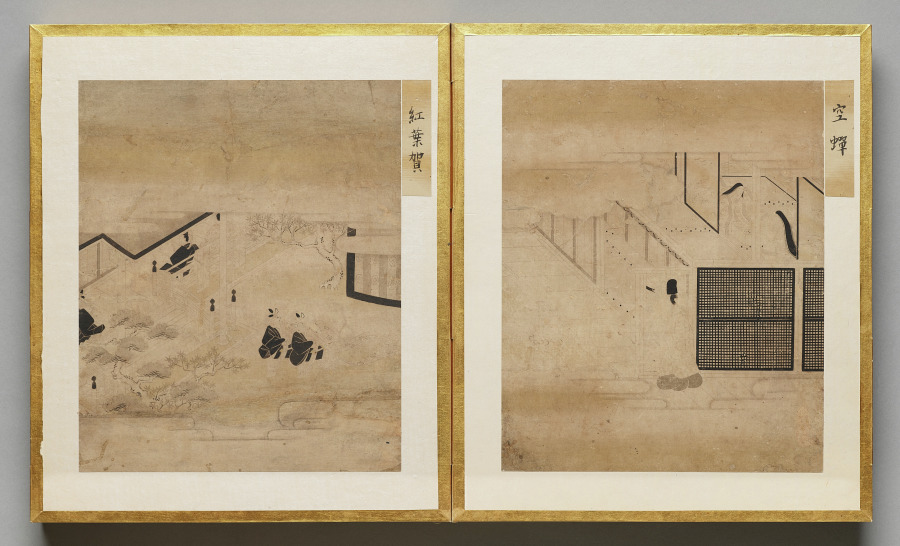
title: Shell of the Locust from Album of Illustrations for the Tale of Genji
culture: Japan, Edo period (1615–1868)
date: 1600s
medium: painting in an accordion-style album; ink, light color, and gold on paper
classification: Bound Volume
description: This album contains illustrations for the classic literary work the Tale of Genji, authored in the 1000s by Murasaki Shikibu, an aristocrat of the Heian period (794–1185) court. The scenes are painted in the “white drawing” (hakubyō) mode, in which a fine ink line is used to depict figures and spaces with great subtlety, punctuated only occasionally by traces of red pigment for a character’s lips, a detail of a garment, or a decorative element. These two scenes illustrate episodes from the chapters “Thin Veil of Cloud” (Usugumo) and “Barrier Gate” (Sekiya).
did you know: The illustrations are identified by chapter title in cartouches to the upper right of the paintings.